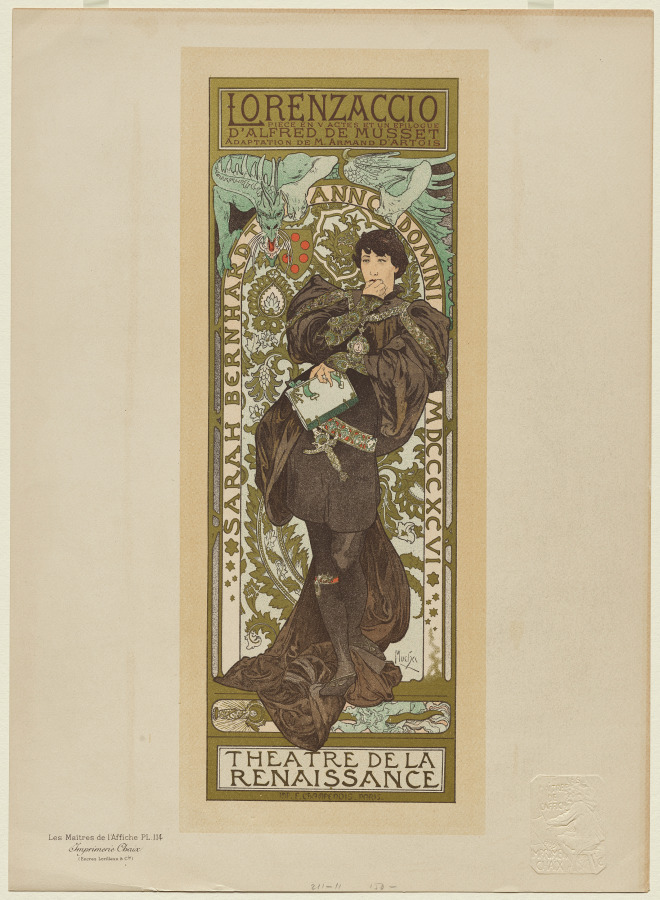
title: Lorenzaccio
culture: Czechoslovakia, late 19th-early 20th century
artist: Alphonse Mucha (Czech, 1860–1939)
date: 1896–1900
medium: color lithograph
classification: Print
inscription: above: Lorenzaccio piece en V actes et un epilogue / D'Alfred de Musset Adaptation de M. Armand D'Artois (printed); Arch: Sarah Bernhardt Anno MDCCCXCVI (printed); below: Teatre de la Renaissance / 10 P.F. Champenois, Paris (printed)